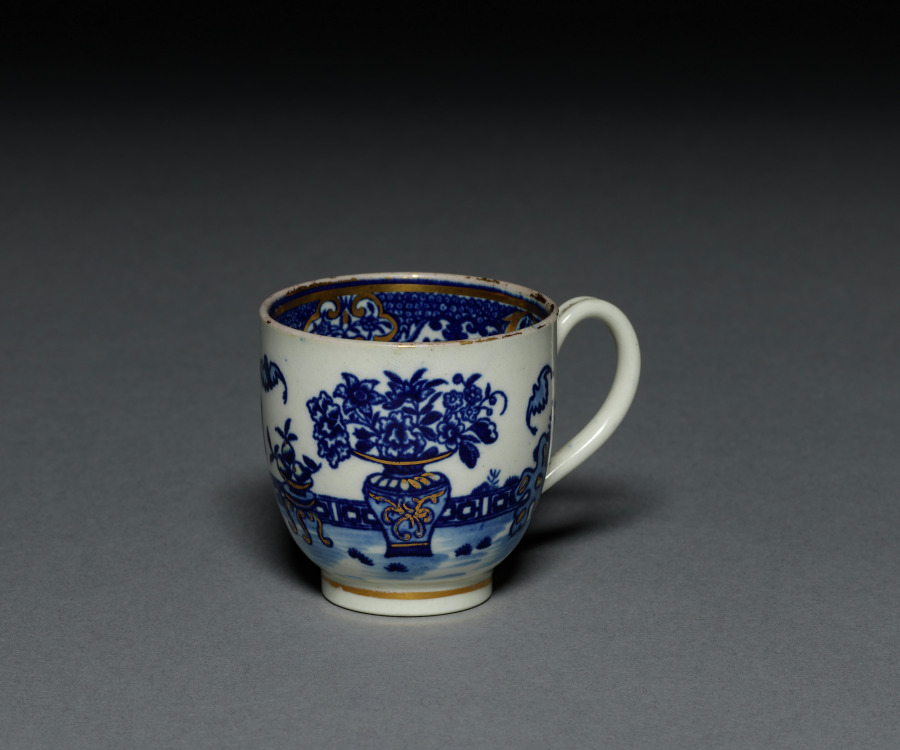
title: Cup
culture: England, 18th century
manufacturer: Worcester Porcelain Factory (British, established 1751)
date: 1760–1780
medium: porcelain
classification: Ceramic